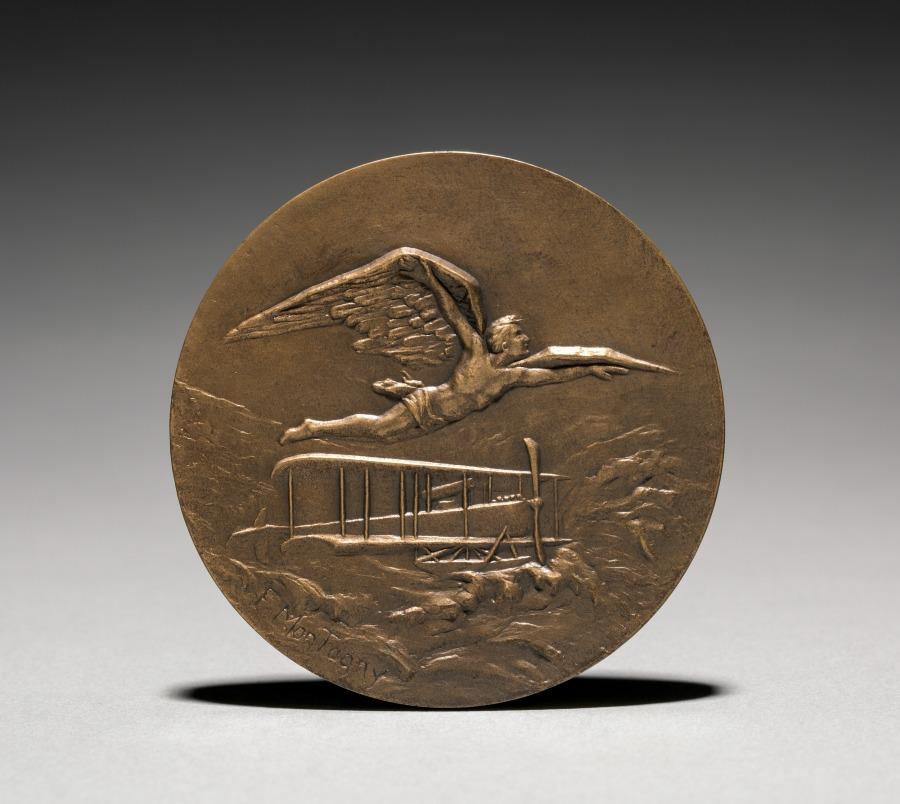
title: Medallion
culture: France, 19th century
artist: F. Montagny (French)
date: c.1920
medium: bronze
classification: Metalwork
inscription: signed: "F. Montagny."